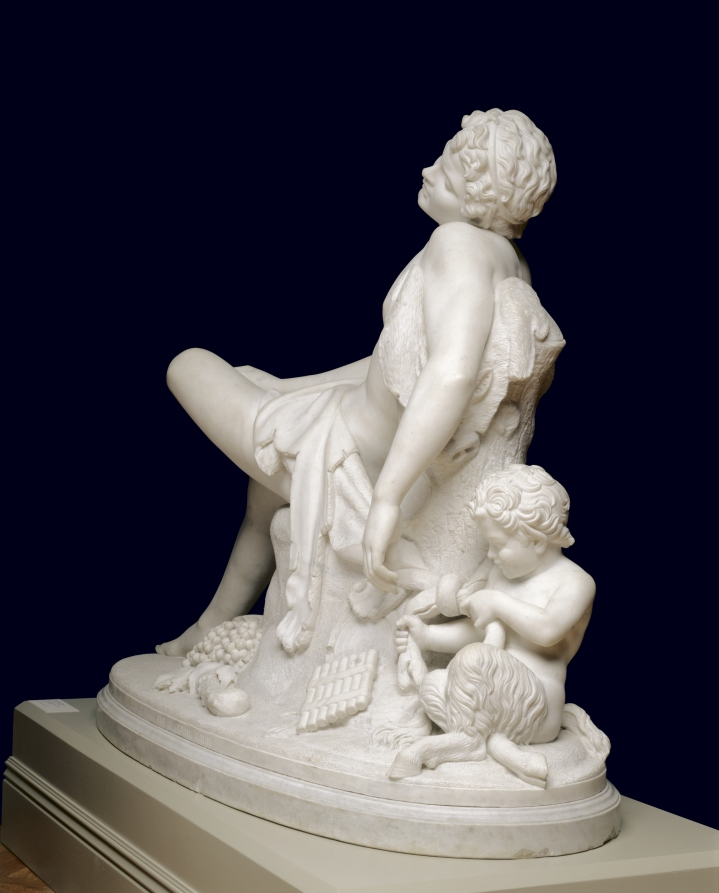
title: The Sleeping Faun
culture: America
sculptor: Harriet Goodhue Hosmer (American, 1830–1908)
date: modeled 1864, carved c. 1870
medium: marble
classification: Sculpture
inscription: Signed and inscribed on base: "H HOSMER Fecit -- Romae"; titled on base: "THE SLEEPING FAUN"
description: Hosmer is the best known female member of a large group of American artists working in Italy during the mid-1800s. The Sleeping Faun, a depiction of a pointed-eared woodland spirit, demonstrates her mastery of the neoclassical style, which was inspired by the art of ancient Greece and Rome. Hosmer’s playful sense of humor infuses the composition: a half-human, half-goat satyr mischievously ties the unwitting faun’s animal skin garment to a tree stump.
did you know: Hosmer said, "I honor every woman who has strength enough to step out of the beaten path. . . ."